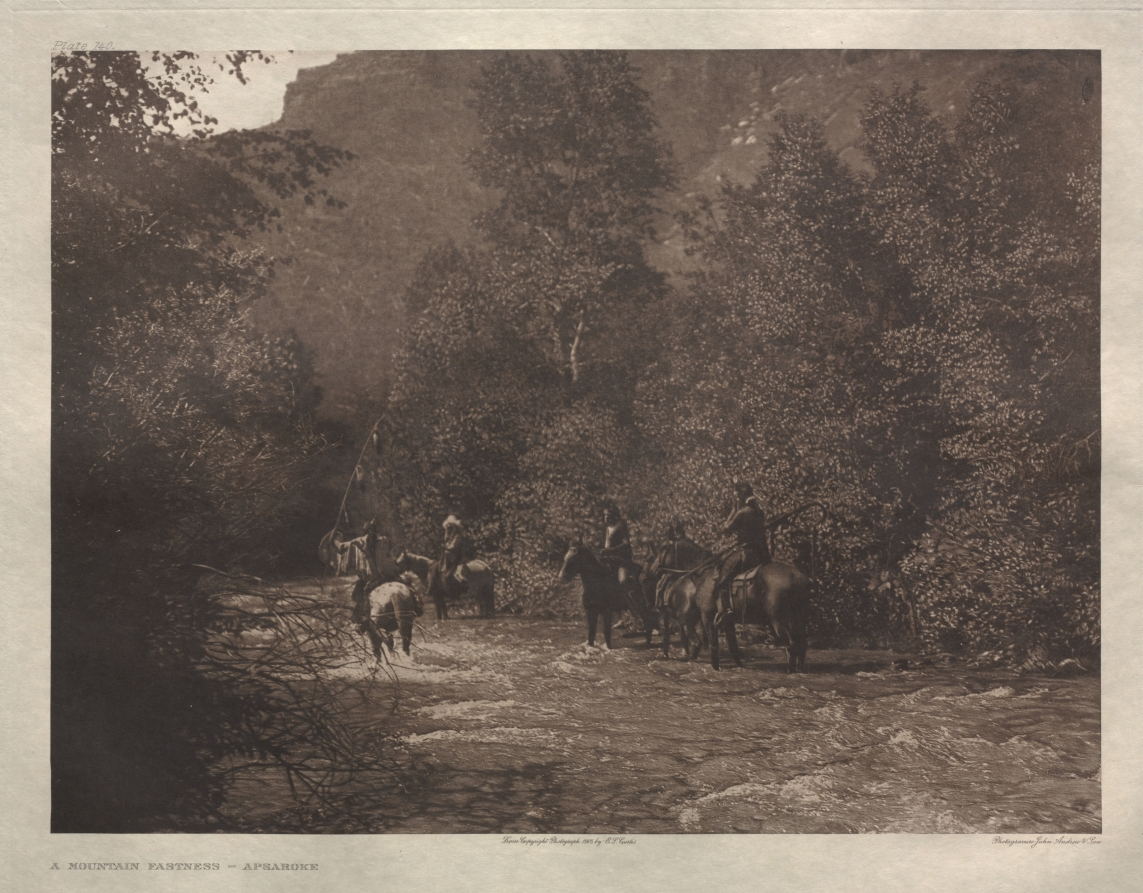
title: Portfolio IV, Plate 140: A Mountain Fastness--Apsaroke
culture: America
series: The North American Indian: being a series of Portfolios picturing and describing the Indians of the United States, the Dominion of Canada, and Alaska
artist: Edward S. Curtis (American, 1868–1952)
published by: The University Press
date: 1905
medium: photogravure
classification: Portfolio